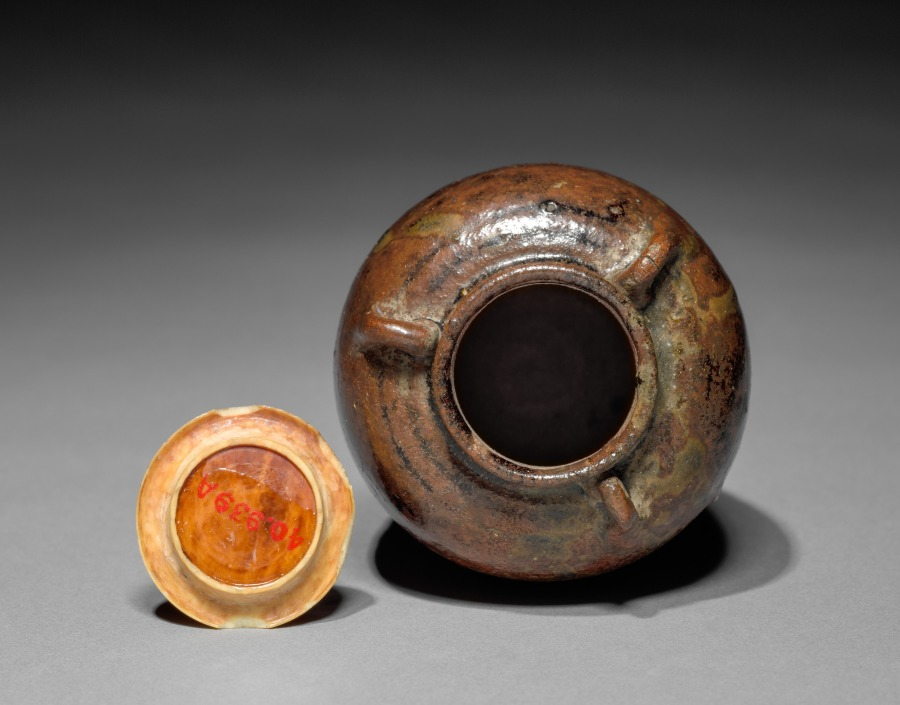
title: Tea Caddy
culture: Japan, Edo period (1615–1868)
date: 1700s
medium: porcelain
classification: Ceramic